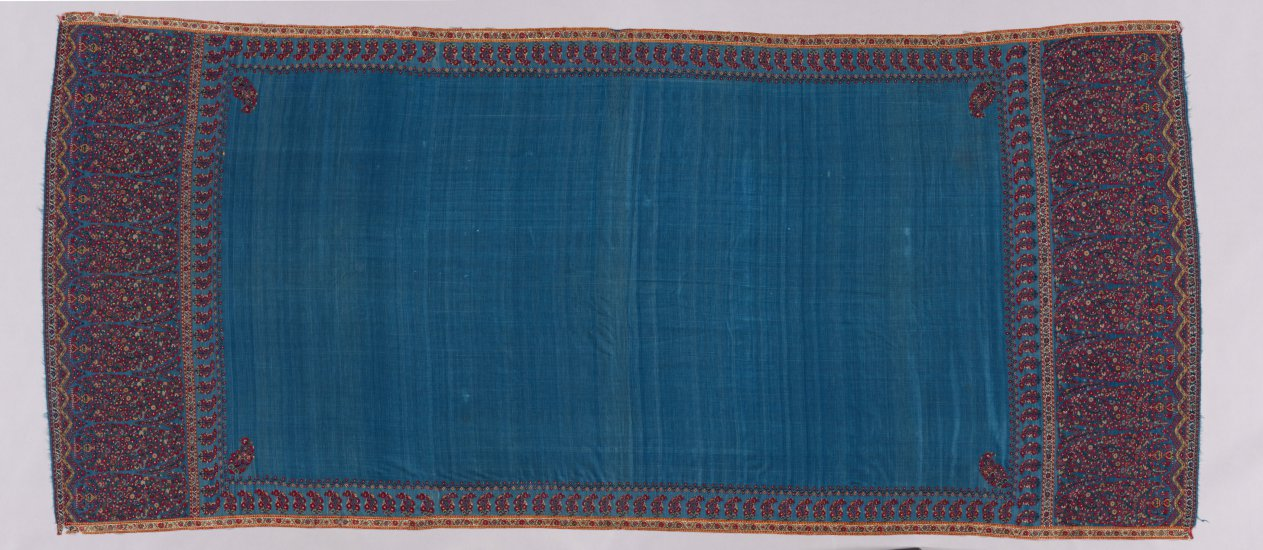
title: Shawl with boteh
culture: India, Kashmir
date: 1820–1830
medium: 2/2 twill tapestry weave, double interlocked: wool, possibly pashmina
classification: Textile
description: Thousands of luxurious shawls imported from Kashmir, India, were status symbols that European-manufactured imitations could not equal. Those woven in Paisley, Scotland, gave rise to the popular term paisley. Their representation in portraits records the evolution of shawl fashions, which helps to date surviving examples. The coveted quality of Kashmir shawls was achieved with luxurious fine goat hair woven in twill tapestry to form small colorful blossoms. Such shawls are lightweight, supple, and warm. A plethora of blossoms arranged in small vases on stands form the large paisley or boteh motifs, while smaller versions enliven the sides of the field. Such floral displays evolved from blossoming plants possibly in 16th-century India.